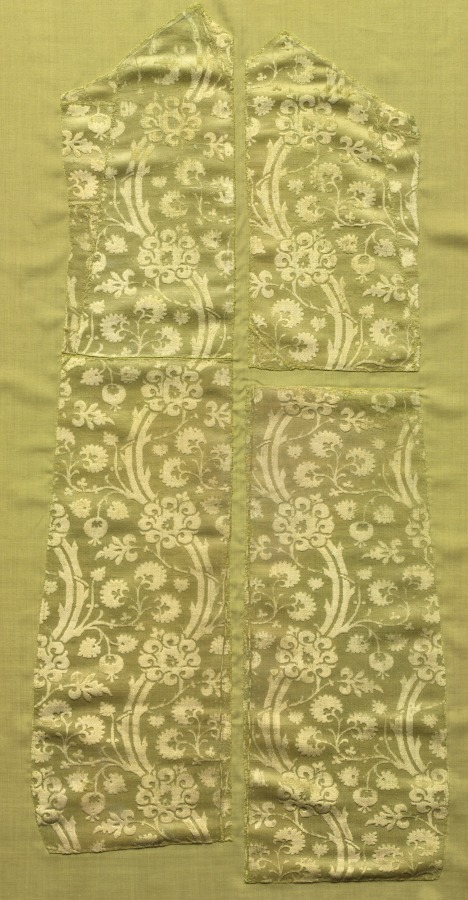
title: Fragments of a Chasuble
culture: Italy, beginning of the 15th century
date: 1400–1420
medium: velvet (cut and voided); silk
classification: Velvet